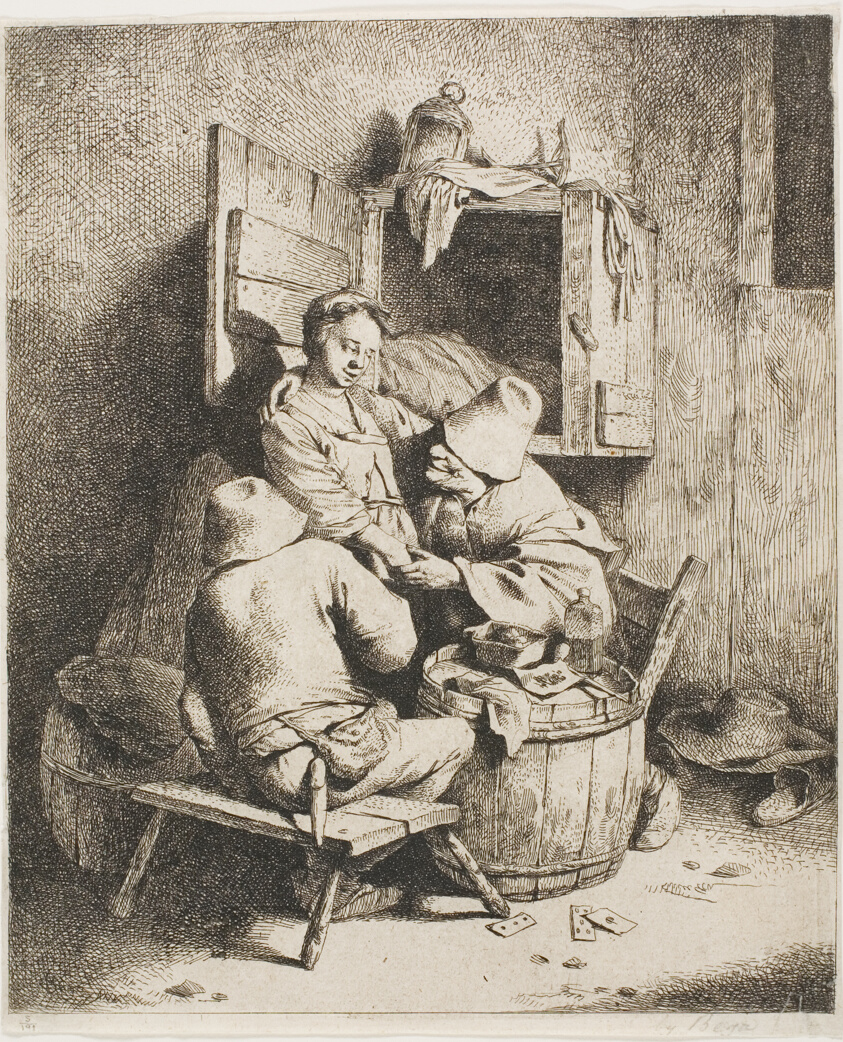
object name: Print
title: A Young Man Caressing the Young Hostess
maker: Cornelis Pietersz Bega; Dutch, 1631/32-1664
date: c. 1650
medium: Etching in black on paper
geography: Netherlands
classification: etching; print; prints and drawing